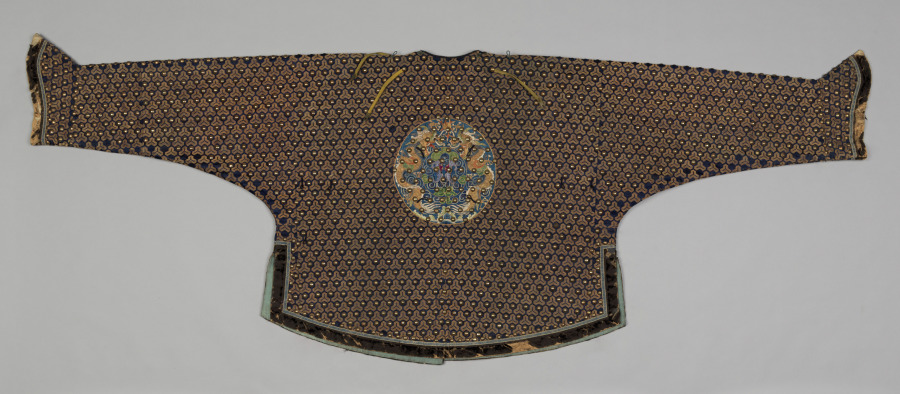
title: Ceremonial Uniform: Jacket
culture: China, Qing dynasty (1644-1911)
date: 1644–1911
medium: satin weave silk with gold metal thread embroidery; supplementary weft; black velvet; metal (brass?); lined in blue silk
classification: Arms and Armor